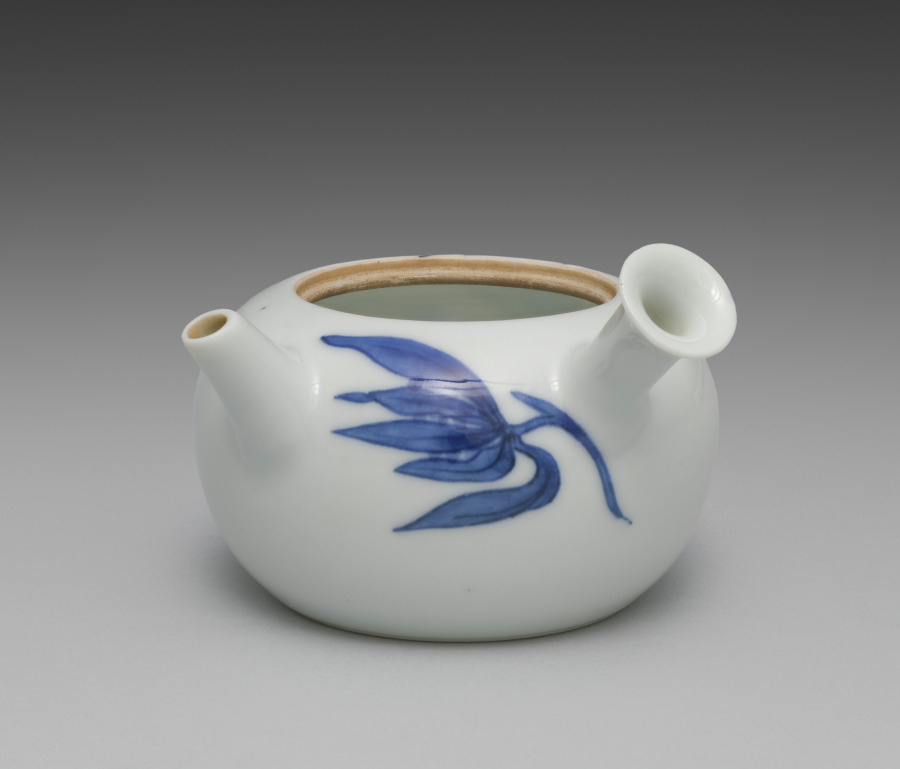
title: Teapot from Tea Set with Orchids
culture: Japan, Meiji period (1868–1912)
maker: Seifū Yohei III (Japanese, 1851–1914)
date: c. 1893–1914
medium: Porcelain with underglaze blue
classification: Ceramic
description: Although the teapot here is stored in a separate box from the five cups, these six pieces may once have been part of a tea set that included other tools such as a water cooler. The teacups have orchid flowers on both sides in underglaze blue, as well as a blue band inside the footring. The teapot has the same design and a blue band painted around the bottom of the lid’s knob. The cups’ long wood storage box is stamped on the exterior, over the lid and base, with a small red seal reading “Satō.” The same seal appears on five small squares of yellow textile, one placed in the bottom of each compartment in the teacup storage box. These are additional to the customary yellow cloths stamped with a “Seifu” seal. Interestingly, four of the Seifū cloths are stamped with an ovoid seal, while the remaining cloth, which is a slightly lighter color, has an unusual seal that is not quite gourd-shaped and with the fū of Seifū in a stylized, unrecognizable form. The teapot has its own box with a Satō seal and is wrapped with an orange textile stamped with the same unusual Seifū seal. A set with a very similar surface design is in the Brooklyn Museum. The Brooklyn set has a water cooler and a small pitcher, in addition to the teapot and cups, and all are in a single storage box. This box records the tea tools as made with kanpakuji, or “bright-jewel white porcelain,” counted among Yohei III’s most important inventions, and carved images. In fact, both sets have a white surface much closer in coloration to the cool white of porcelain clay used in Kyoto at the time, and the designs are simply painted. The Brooklyn set was thus likely mismatched at some point with a box intended for another tea set. Nonetheless, the box may have helped prevent the set’s original components from being dispersed, and the set itself provides insight into how the other tools from the present set may have looked.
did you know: This tea set with orchids has a side-handled pot called a kyūsu, used for steeping, straining, and serving tea.